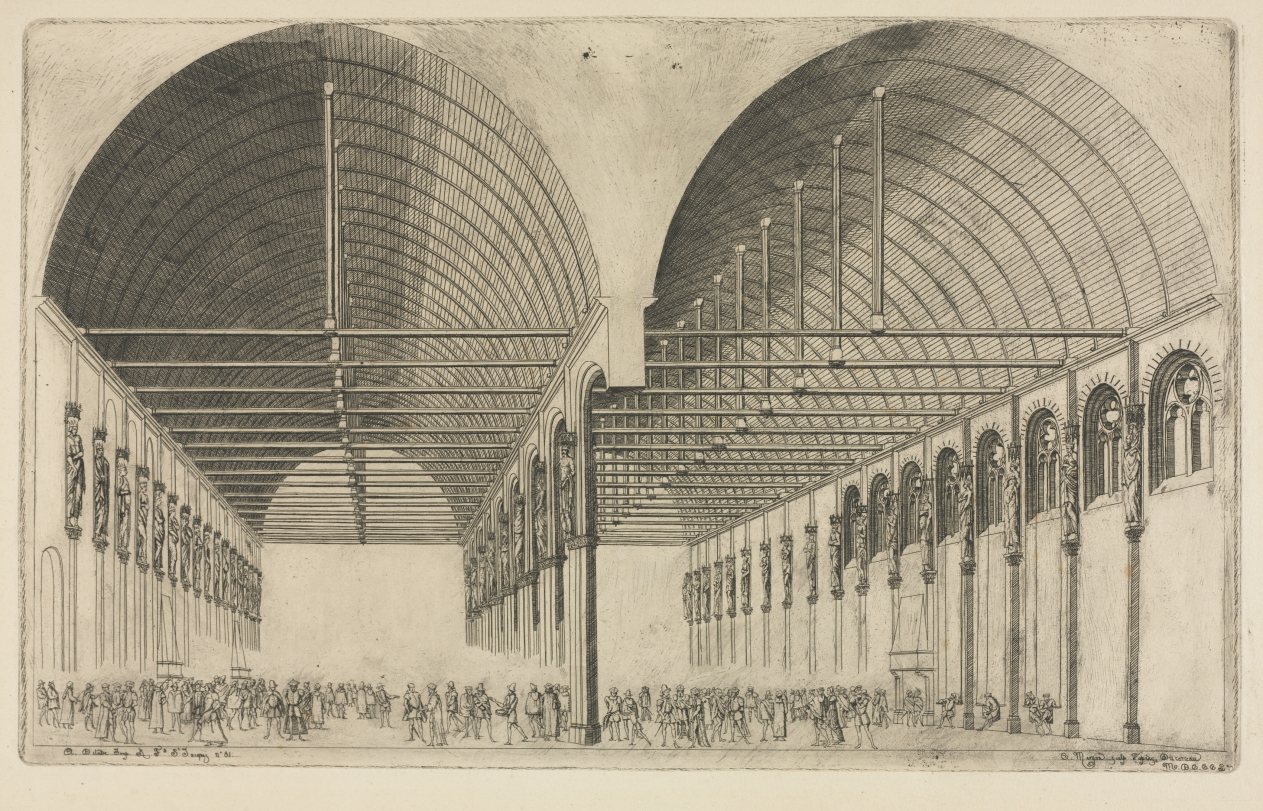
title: The Antechamber of the Palace of Justice, Paris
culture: France, 19th century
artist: Charles Meryon (French, 1821–1868)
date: 1855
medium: etching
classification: Print